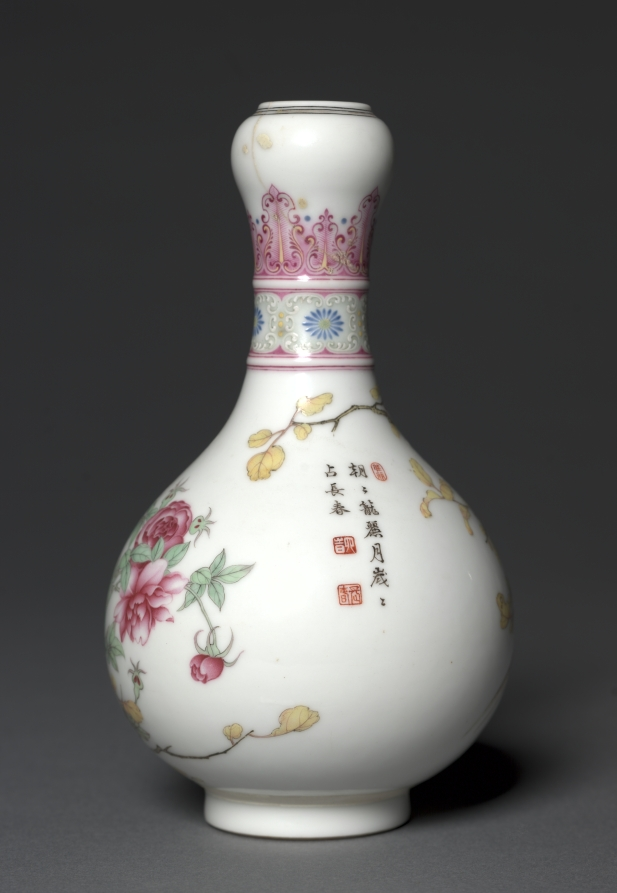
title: Vase with Golden Pheasants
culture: China, Jiangxi province, Jingdezhen kilns, Qing dynasty (1644-1911), Qianlong mark and period (1736-95)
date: 1736–95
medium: porcelain painted in polychrome enamels over transparent glaze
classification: Ceramic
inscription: 乾隆年製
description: The flower-and-bird painting in this vase was intricately executed in colored enamels (falangcai), with careful modeling, shading, and blending of colors reflecting European influences through missionary-artists at the Qing court. The Jesuit artist Giuseppe Castiglione (1688–1766), in particular, exerted tremendous impact at the Qianlong academy.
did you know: Refined porcelains produced in Jingdezhen kilns were sent to Beijing palace workshops to be decorated in falangcai technique under direct imperial supervision.